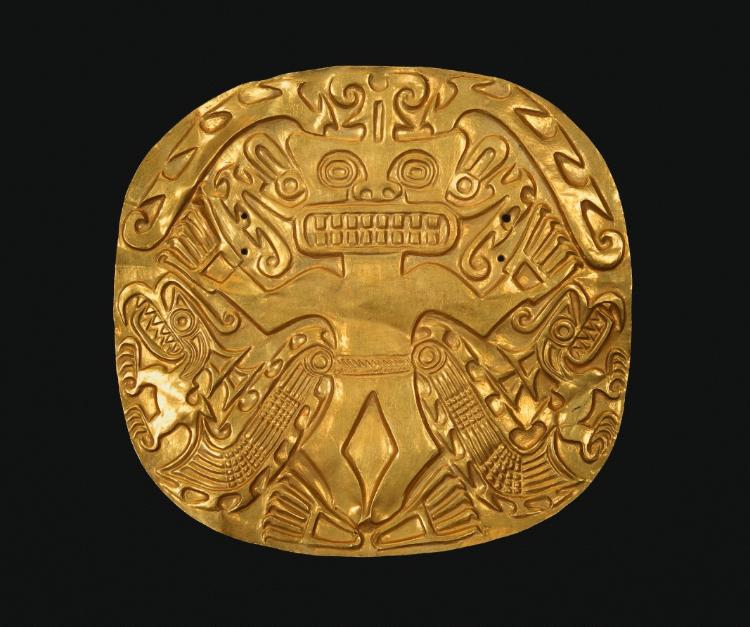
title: Pectoral (Chest Plaque)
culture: Intermediate Region, Panama, Conte style, 5th-10th Century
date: 400–900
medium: gold alloy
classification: Metalwork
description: Harvard archaeologists excavated this and seven other ornaments from several burials at Sitio Conte, a cemetery famous for its lavish graves of powerful chieftains. The young man buried in Grave 26 was such a chief. His status was stunningly memorialized by 21 human companions and 475 objects, many of them personal ornaments made of gold, including a large chest plaque and a rod-shaped ear ornament. The creature on the chest plaque, found close to the chief’s body, has reptile claws and perhaps the head crest of an iguana. Its meaning is unknown but perhaps, as in later periods, reptilian imagery and the warm gleam of gold linked rulers with the sun’s creative force.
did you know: Panning for gold was viewed as a sacred activity among the ancient inhabitants of Costa Rica and Panama.